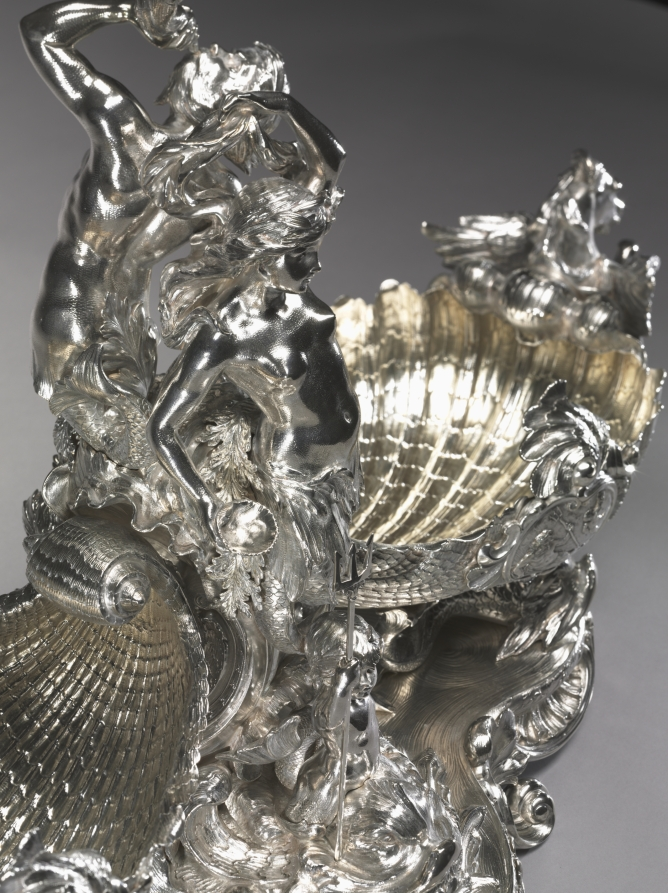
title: Centerpiece from the Nereid Service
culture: England, late 19th-early 20th century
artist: Goldsmith's & Silversmith's Company (British)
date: c. 1900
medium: silver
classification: Silver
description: Originally thought to have been made by the early 19th-century London silversmith Paul Storr because it had been marked with spurious Storr hallmarks, more recent scholarship has revealed that this service, representing the triumph of Great Britain on the high seas through the allegorical images of Grecian nymphs (nereids), was actually made to display at the 1900 world's fair in Paris. Such nationalistic fervor permeated design at the turn of the 20th century, especially in the years leading up to the First World War, when national pride was brought to its heels in Europe through a devastating conflict.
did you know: This centerpiece is actually the product of many hands since the Goldsmiths' and Silversmiths' Company operated as a cooperative of silversmiths who sold their work through the company.